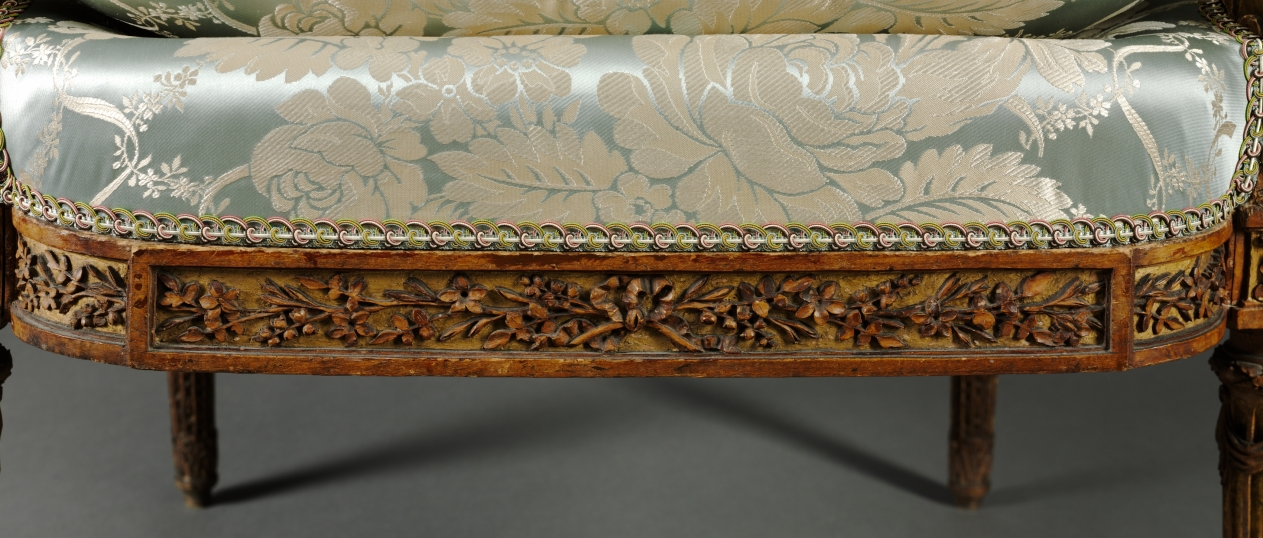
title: Armchair (Fauteuil) (1 of 2)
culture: France, 18th century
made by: Nicolas-Denis Delaisement (French)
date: c. 1785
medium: boxwood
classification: Furniture and woodwork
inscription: signed on back of frame of seat underneath: Delaisement with inverted "s."